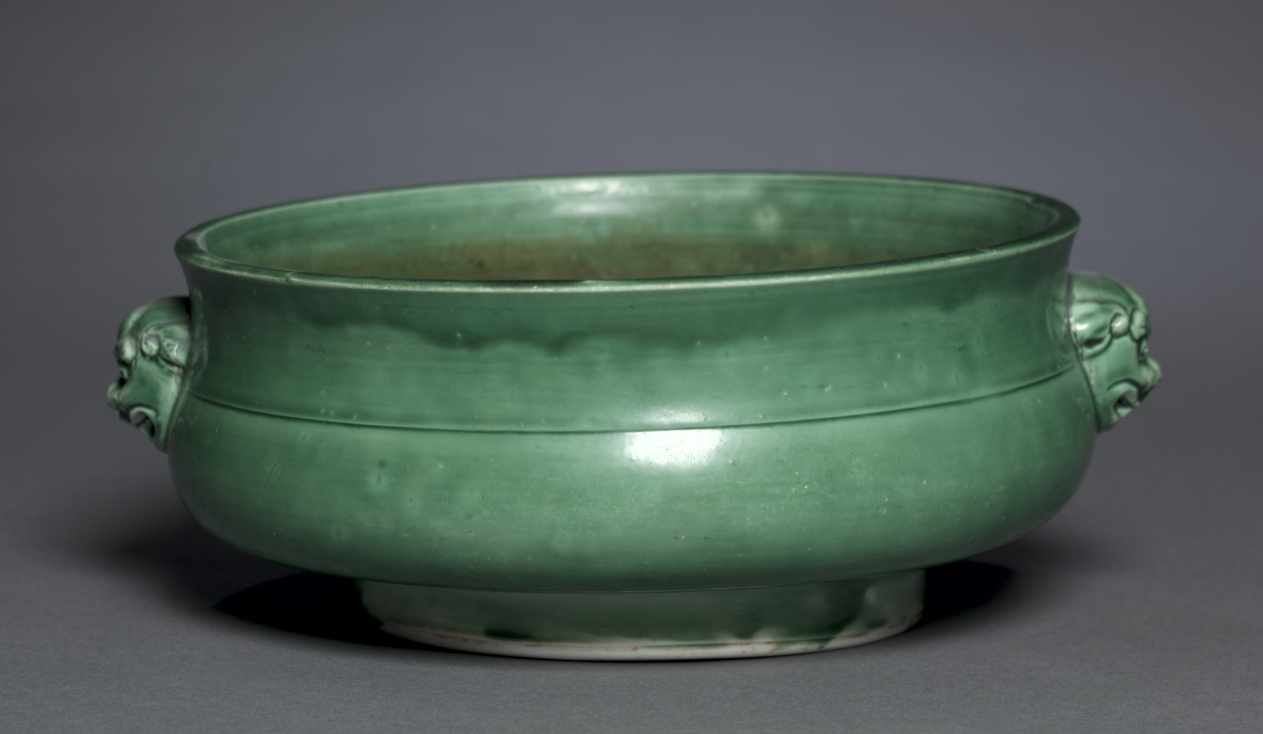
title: Bowl in Form of Archaic Gui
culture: China, Jiangxi province, Jingdezhen, Ming dynasty (1368-1644), Chongzhen reign (1628-44) or Qing dynasty, Shunzhi reign (1644-61), but Ming dynasty (1368-1644), Jiajing mark (1522-66)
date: 1628–61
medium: porcelain with camellia-leaf green glaze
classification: Ceramic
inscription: 大明嘉靖年製